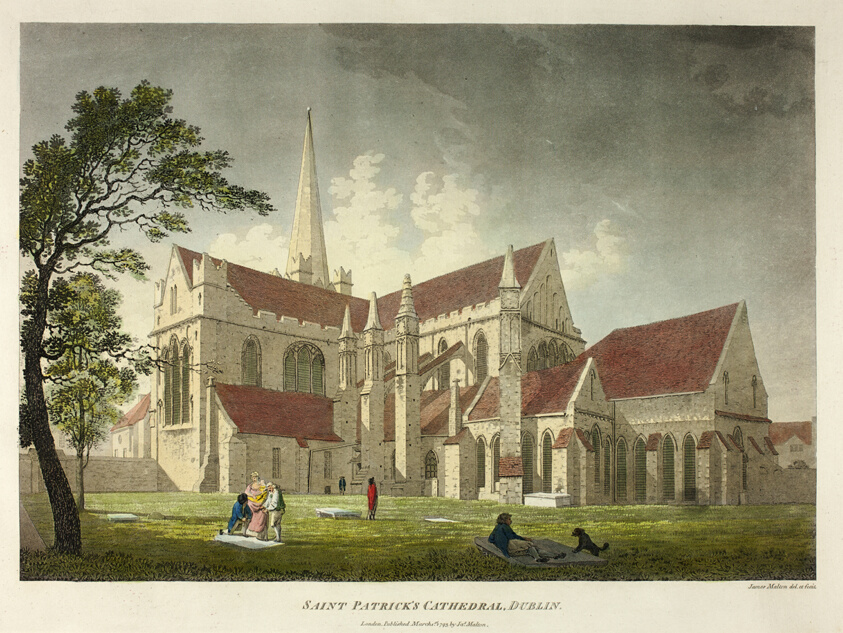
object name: Print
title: Saint Patrick's Cathedral, Dublin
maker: James Malton (English, 1761-1803)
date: published March 1793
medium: Hand-colored aquatint in black on ivory wove paper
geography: England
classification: aquatint; print; prints and drawing